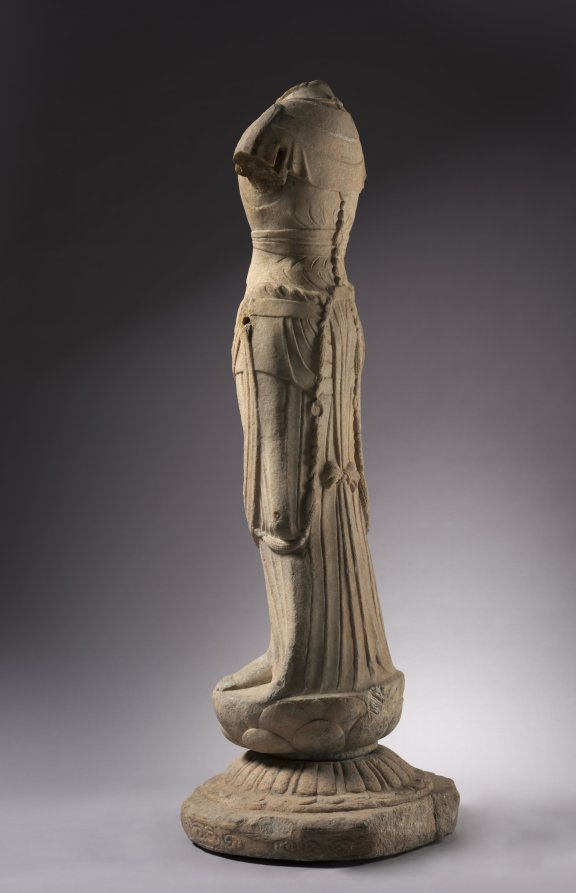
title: Bodhisattva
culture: China, Hebei province, Tang dynasty (618-907)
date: 700s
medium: white marble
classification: Sculpture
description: The bodhisattva is an enlightened being dedicated to the spiritual awakening of all beings. This white marble torso exemplifies the quest for refinement and plasticity of form that mark the golden era of Tang Chinese Buddhist sculpture. The statue was conceived with great power and grandeur. The slight sway of the hip on one side and upraised shoulder on the other result in an elegant S-curve. Emphatic lines cut into the stone create a sense of rhythm and reveal the sculptor’s skill and sureness of execution.